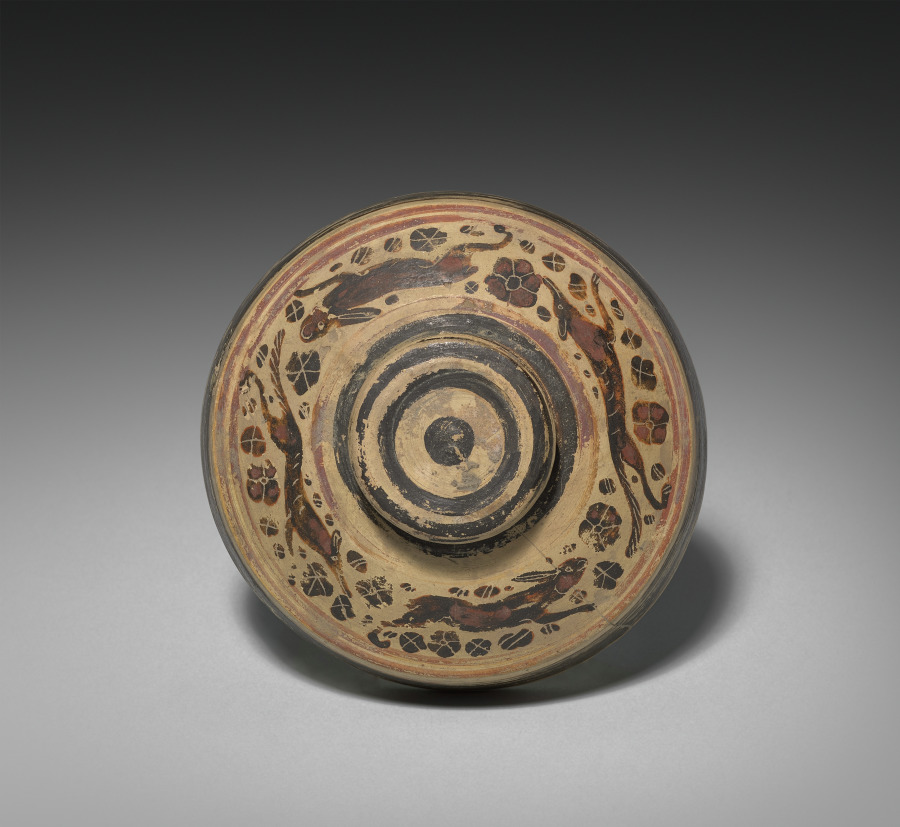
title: Corinthian Vase (lid)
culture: Greece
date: 600s BCE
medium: earthenware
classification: Ceramic